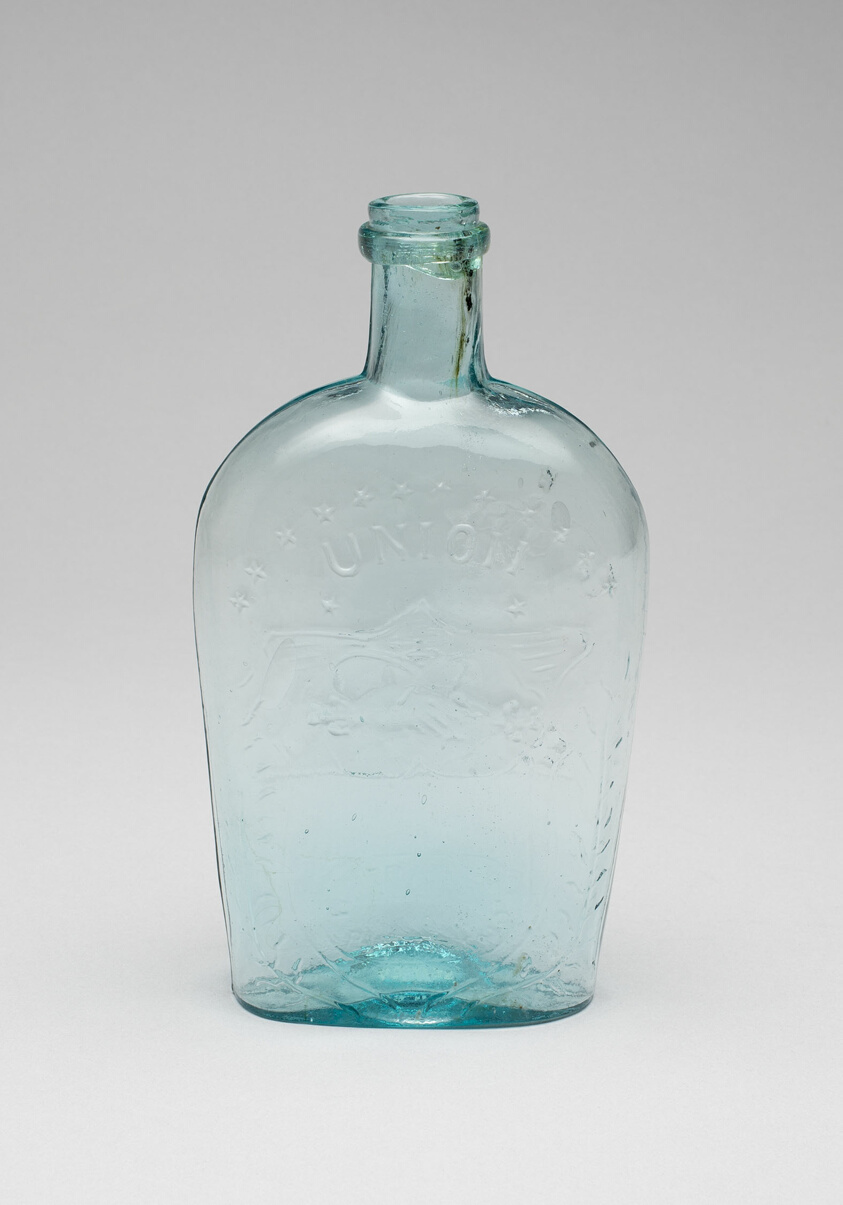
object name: Glass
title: Flask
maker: William Frank & Sons; American, 1870–1876; Pittsburgh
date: 1870–76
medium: Glass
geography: Pittsburgh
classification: flask (bottle); glass; american decorative arts; american arts; decorative arts